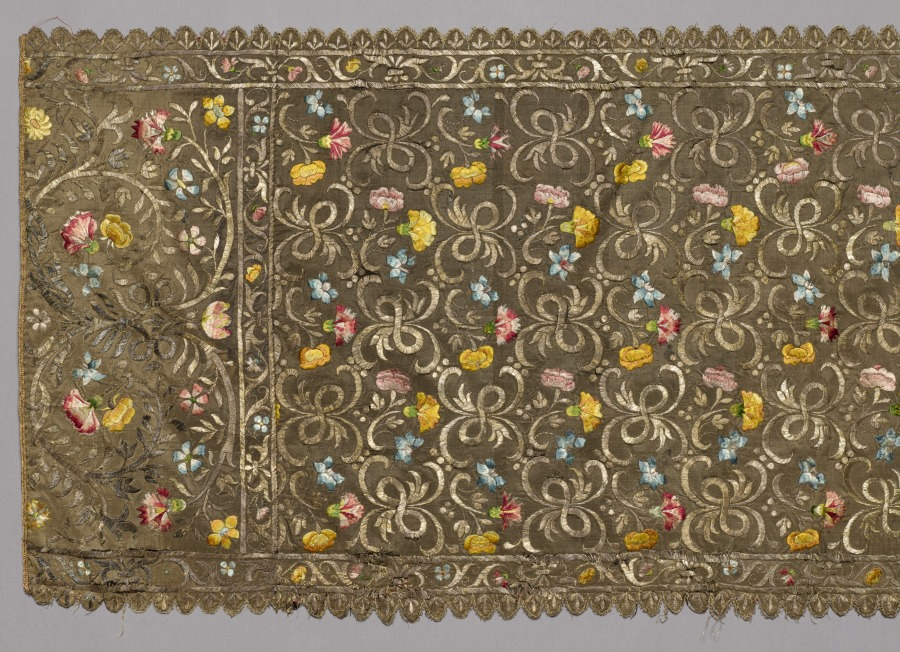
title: Panel, Probably from a Christening Mantle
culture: Italy, late 16th century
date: late 1500s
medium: Silk, gold thread; embroidery: couching, stem, long, and short stitches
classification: Embroidery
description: This panel is likely from a christening mantle, a decorative shawl or cape worn during the procession at a christening. This example features radiant gold thread enhanced with eight vibrant colors of shiny silk thread that create a delicate pattern of blossoms issuing from ornate stems. The decoration forms the main field and two end sections bordered by foliate motifs.